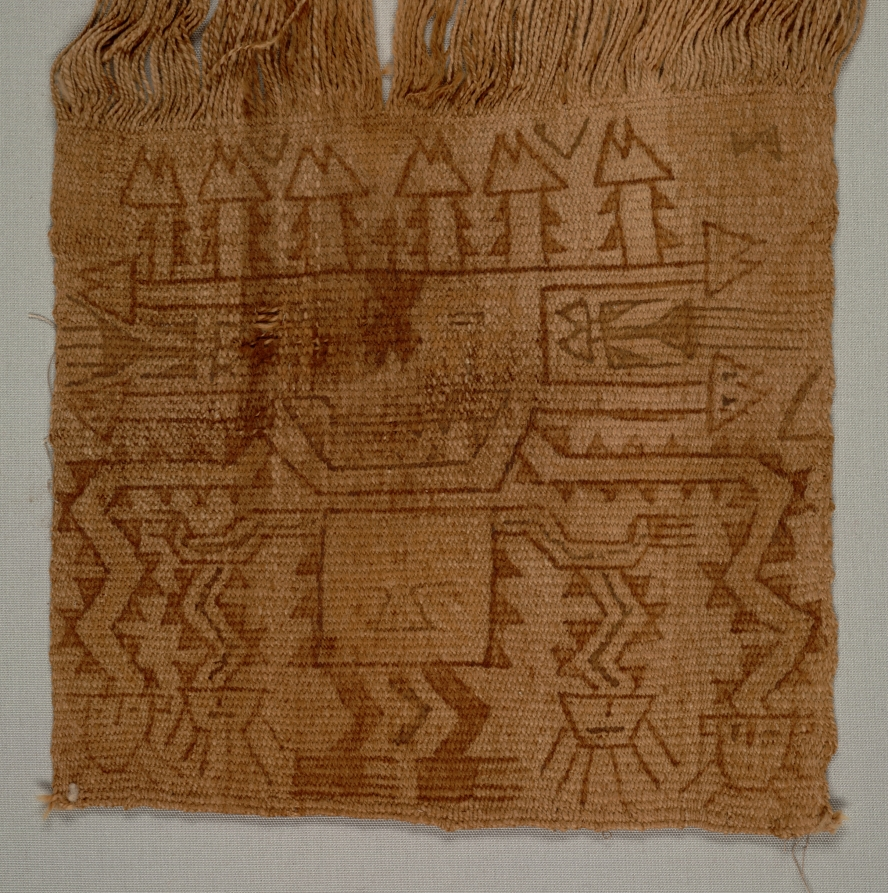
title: Mummy Bundle "Mask"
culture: Peru, South Coast, Ica Valley, Ocucaje site, Paracas style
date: 200 BCE–1 CE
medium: plain warp-faced cloth, painted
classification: Textile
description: The Paracas people buried their dead in pear-shaped mummy bundles, created by carefully wrapping the seated human body in layers of garments and other textiles. Sometimes a painted cloth was placed on the outer layer at the top of the bundle, as though it served as the bundle’s face, head, or “mask.” Some cloths were painted with masklike faces, although others—such as this example—feature complete figures, which may be mythological beings with supernatural appendages.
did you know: These masks fall into two categories, those with only a face and those with a full-bodied figure.